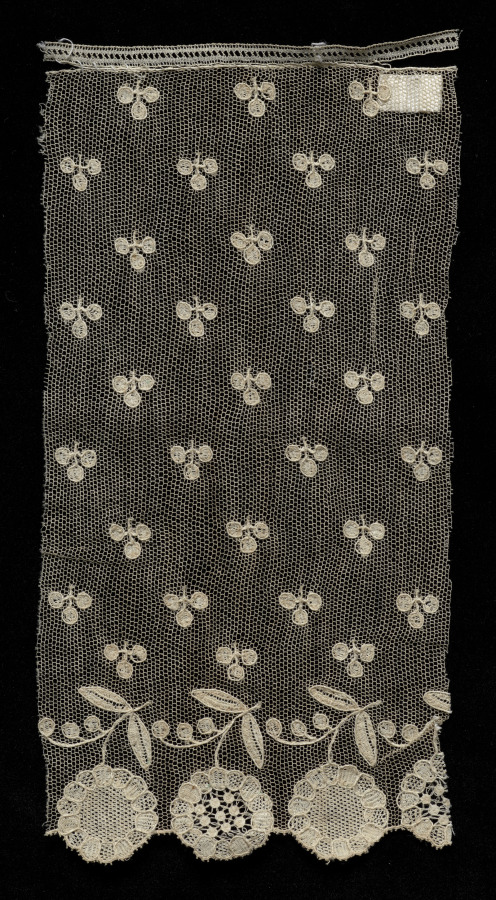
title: Fragment of Lace Edging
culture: Italy, Burano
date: 1900s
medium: Linen: needle lace (Burano Point)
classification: Lace